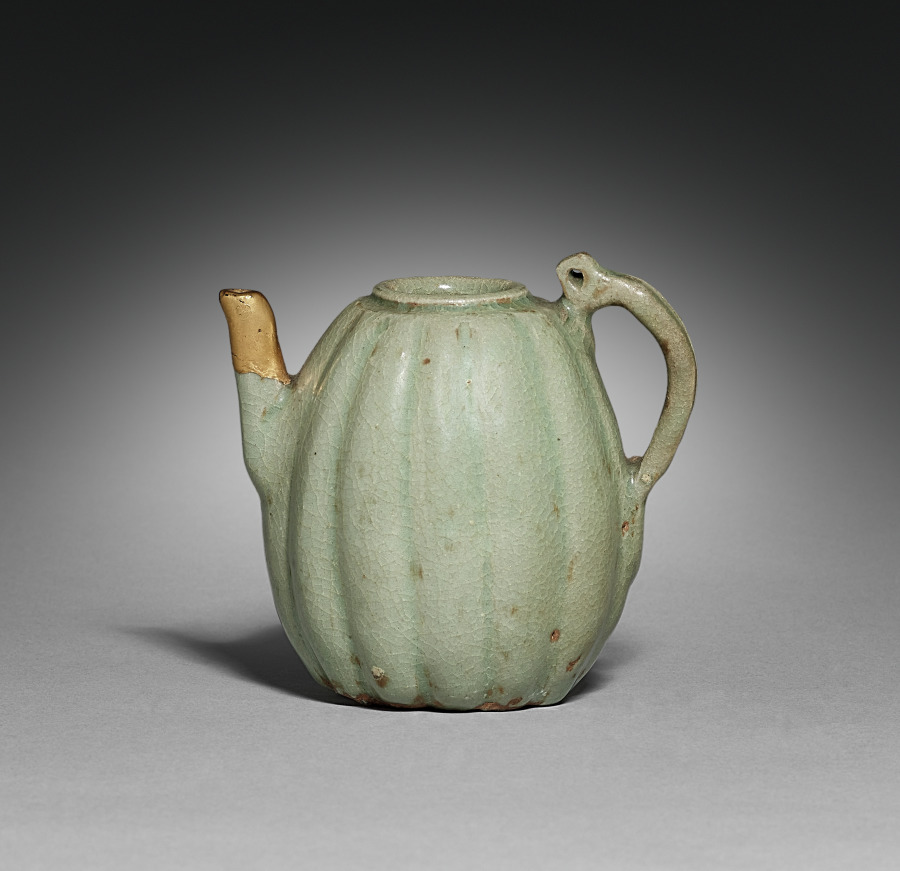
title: Melon-shaped Wine Ewer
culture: Korea, Goryeo dynasty (918–1392)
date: 1100s-1200s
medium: celadon ware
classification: Ceramic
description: Many celadon ceramics, such as these two miniature pots, have been repaired with gold lacquer. Termed kintsugi (literally meaning “gold joinery”) in Japanese, this restoration method highlights broken parts with glittering gold mixed with lacquer. Initiated in 15th-century Japan, the technique follows a popular aesthetic concept called wabi-sabi, which finds beauty in imperfect things. Goryeo celadons were considered rare treasures among early 20th-century Japanese collectors; thus, their broken condition is brilliantly highlighted in gold lacquer, as seen here in the repaired spouts, handle, and lid.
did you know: This miniature wine pot was buried in a tomb for the soul of the deceased.